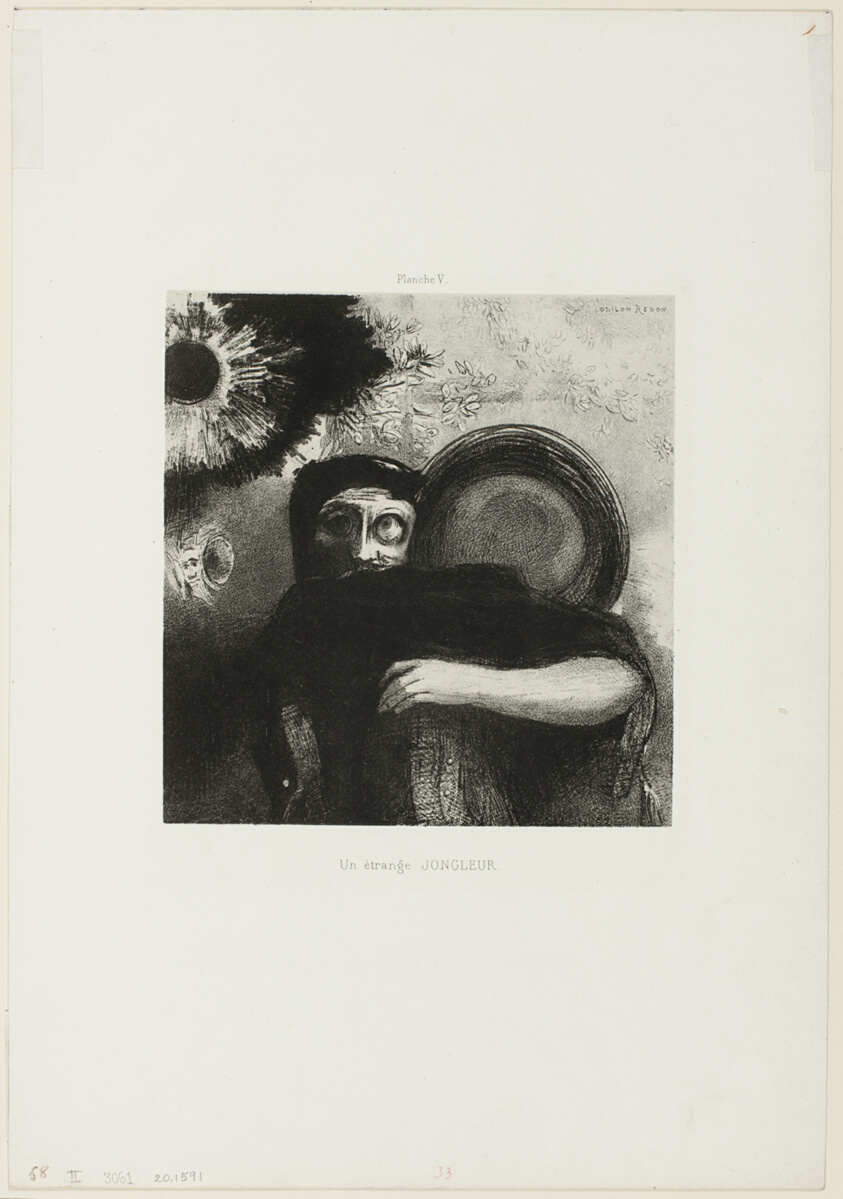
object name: Print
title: A Strange Juggler, plate 5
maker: Odilon Redon (French, 1840-1916)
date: 1885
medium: Lithograph in black on cream China paper laid down on ivory wove paper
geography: France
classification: lithograph; print; prints and drawing; paper